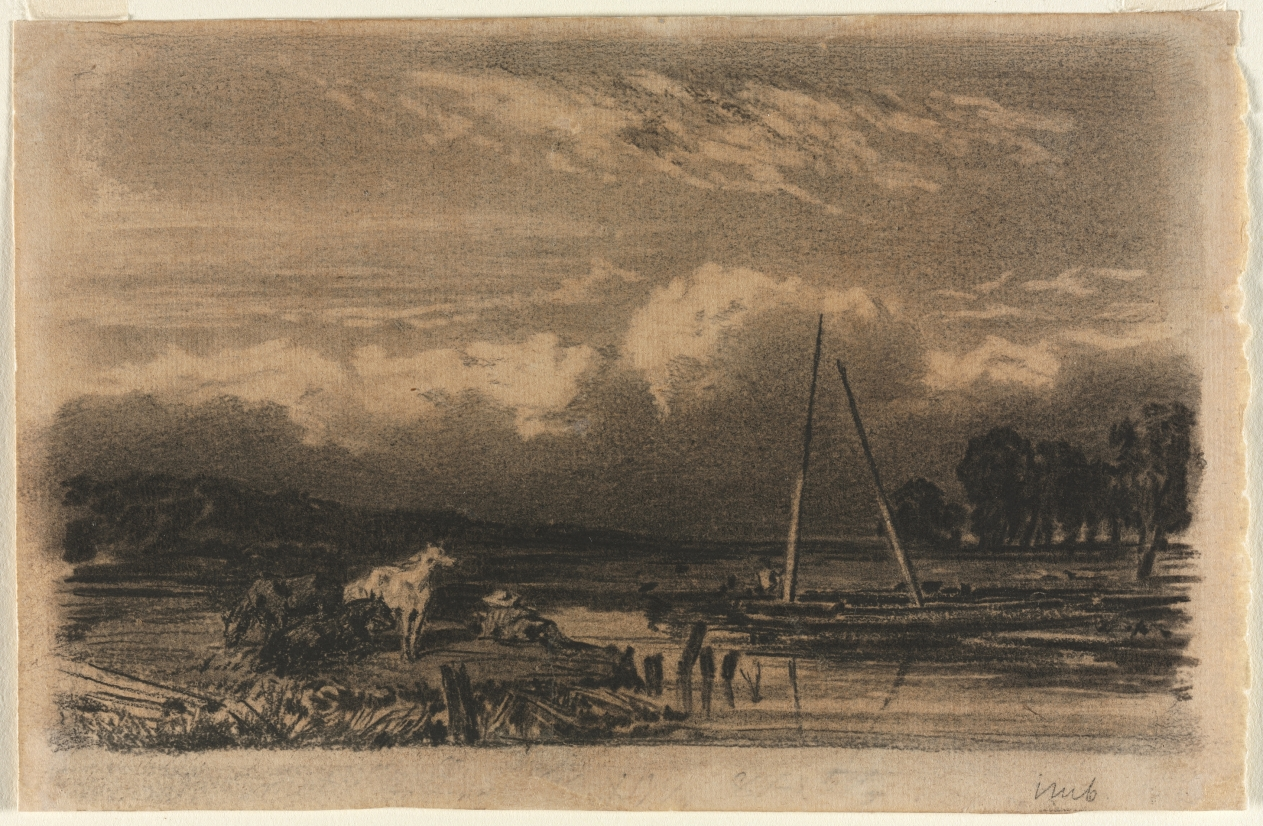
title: English View, after Jules Dupré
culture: France, 19th century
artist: after Jules Dupré (French, 1811–1889)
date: 1800s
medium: charcoal, with stumping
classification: Drawing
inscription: lower right, in graphite: [imb ?]